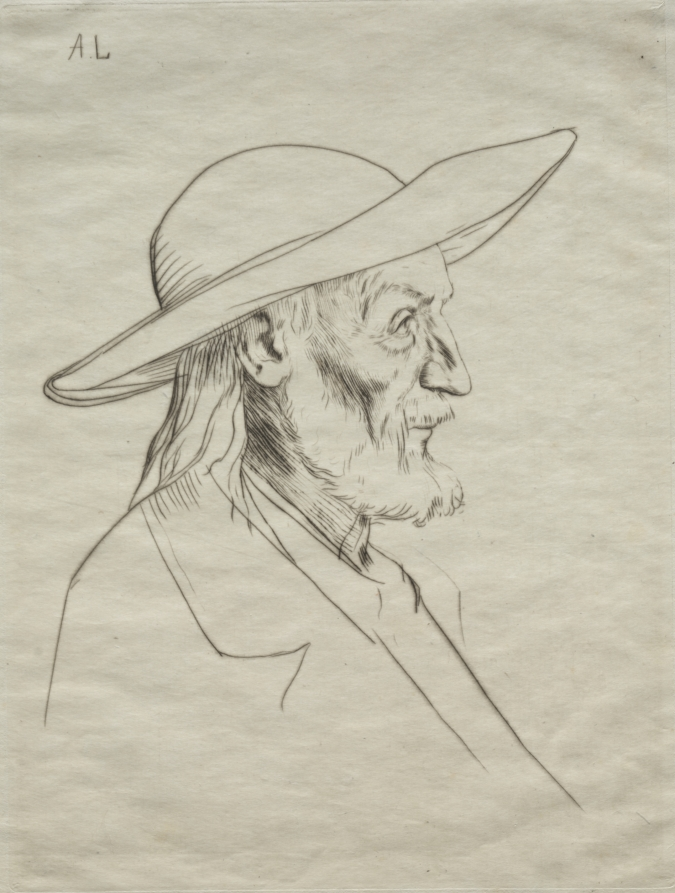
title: Breton Peasant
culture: France, 19th century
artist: Alphonse Legros (French, 1837–1911)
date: c. 1857–1911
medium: drypoint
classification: Print